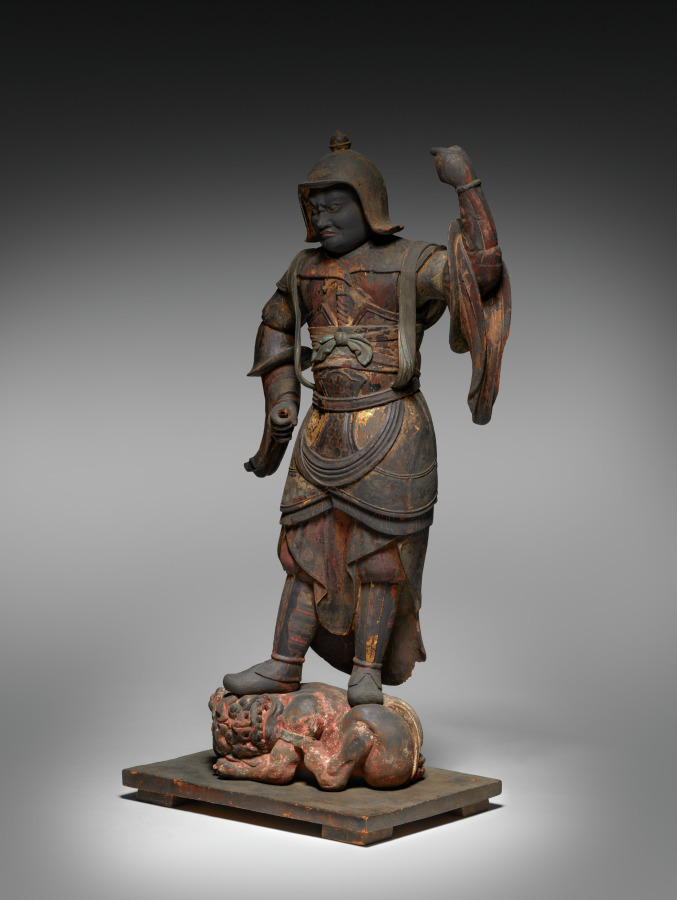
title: Guardian Figure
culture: Japan, Heian period (794–1185)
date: 1000s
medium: wood with polychromy and kirikane (cut-gold)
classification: Sculpture